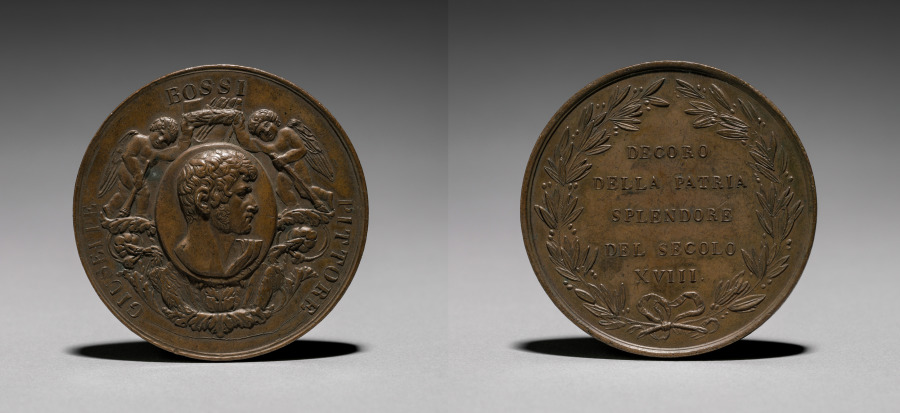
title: Medal: Guiseppe Rossi Pittore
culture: Italy, 19th century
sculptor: Luigi Cossa (Italian, 1789–1867)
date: early-mid 1800s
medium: bronze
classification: Metalwork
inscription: "GUISEPPE ROSSI PITTORE"; signed: "L. Cossa. F."